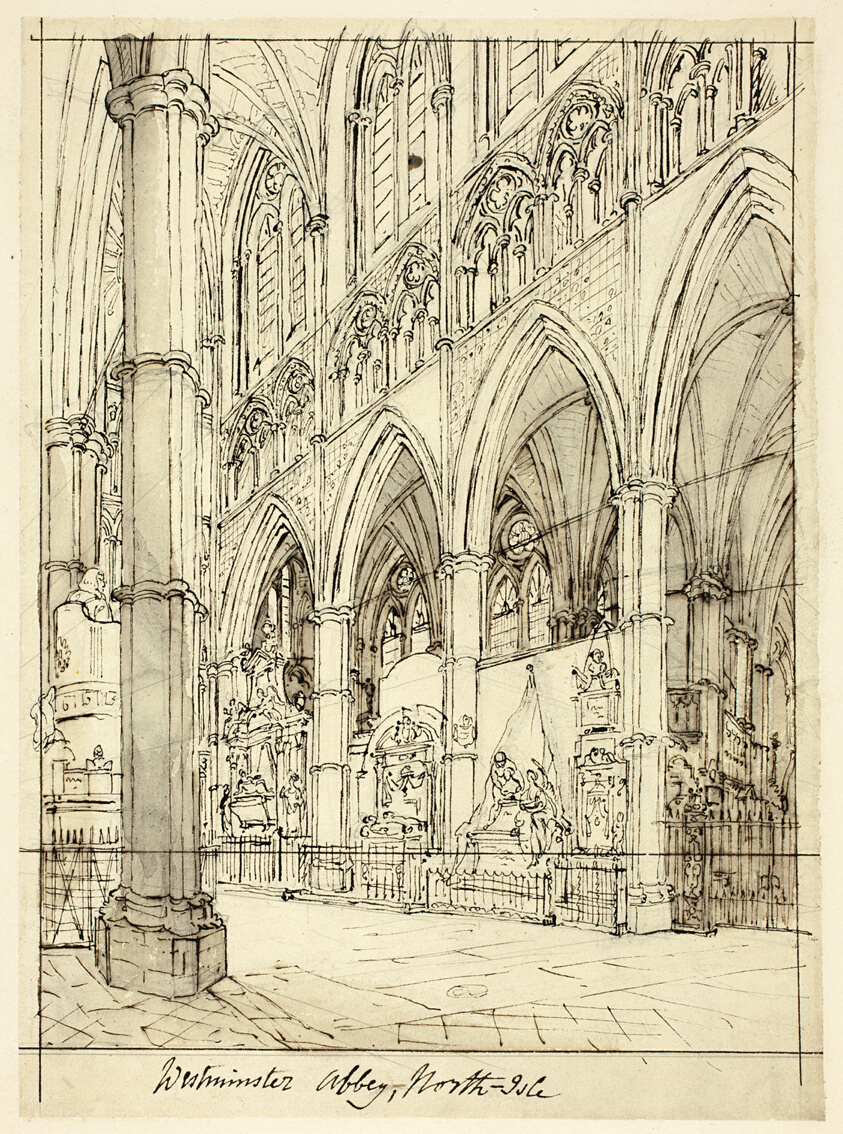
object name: Drawing and Watercolor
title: Study for Westminster Abbey, from Microcosm of London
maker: Augustus Charles Pugin (English, born France, 1762-1832)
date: c. 1809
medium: Pen and brown ink with brush and gray and brown wash, over graphite, on cream wove paper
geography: England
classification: pen and ink drawings; drawings (visual works); prints and drawing